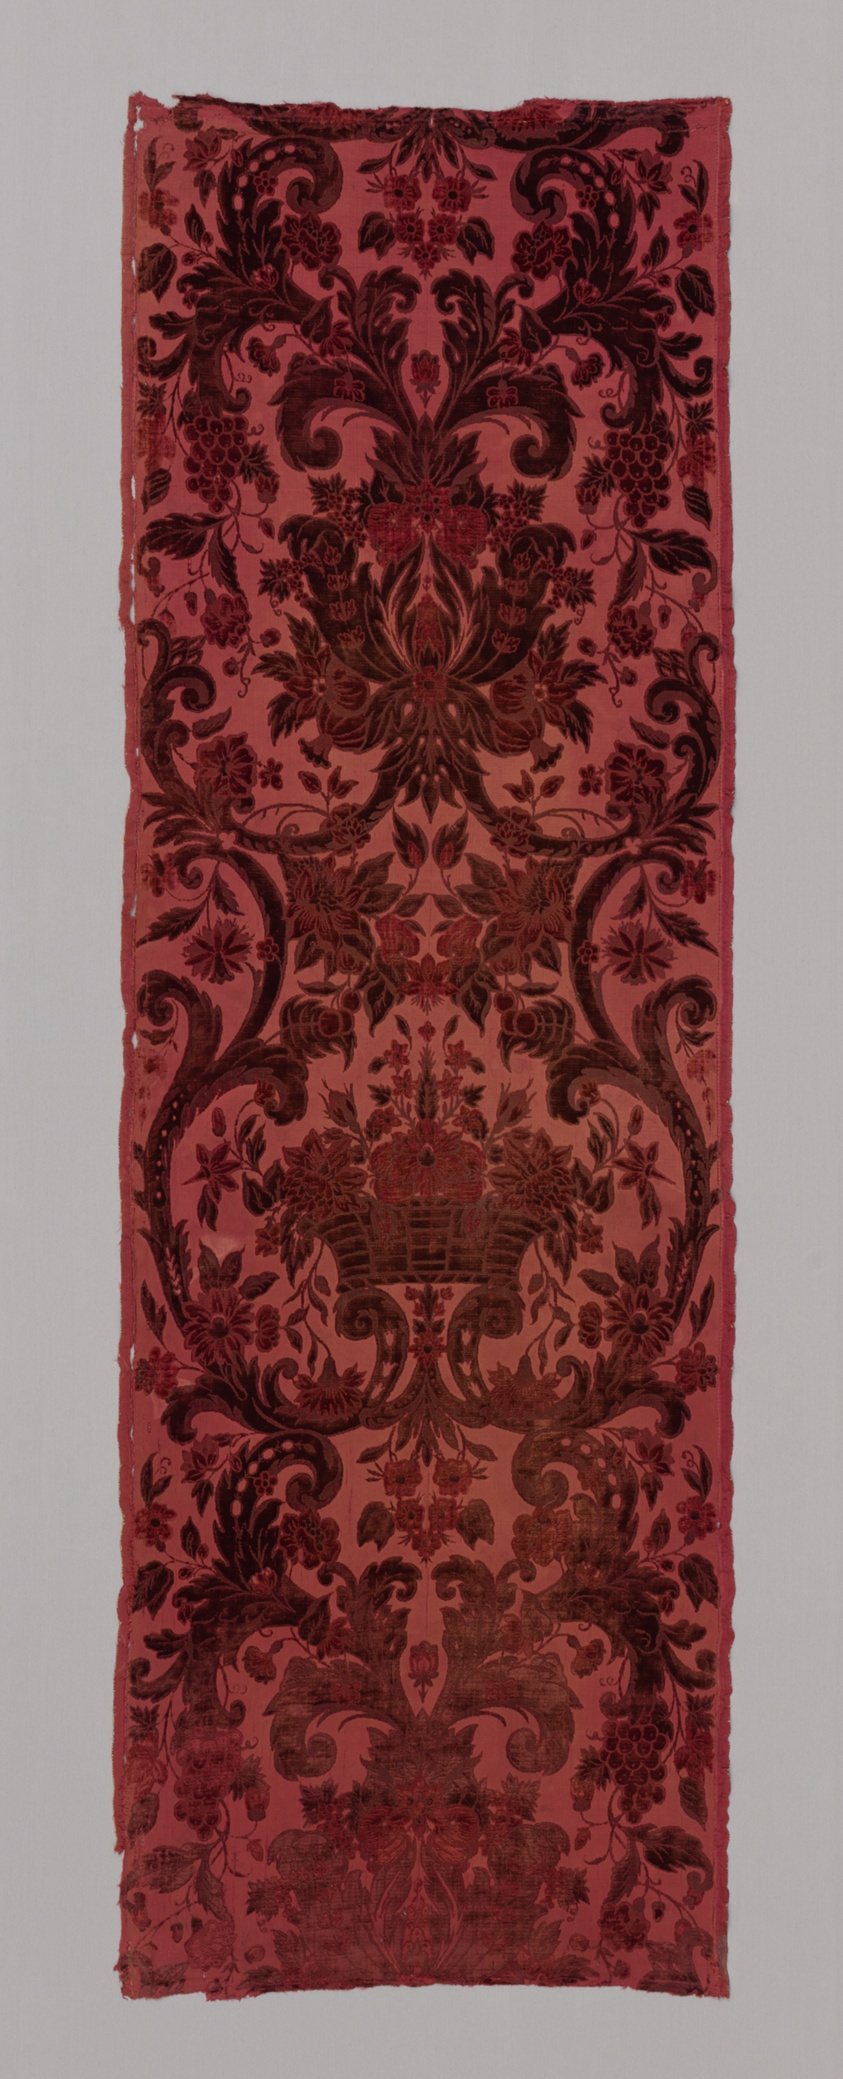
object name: Textile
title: Panel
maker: Italy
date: c. 1725/35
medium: Silk, cut, uncut, voided velvet against satin weave foundation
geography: Italy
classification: textile; weaving - velvet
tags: red (color)